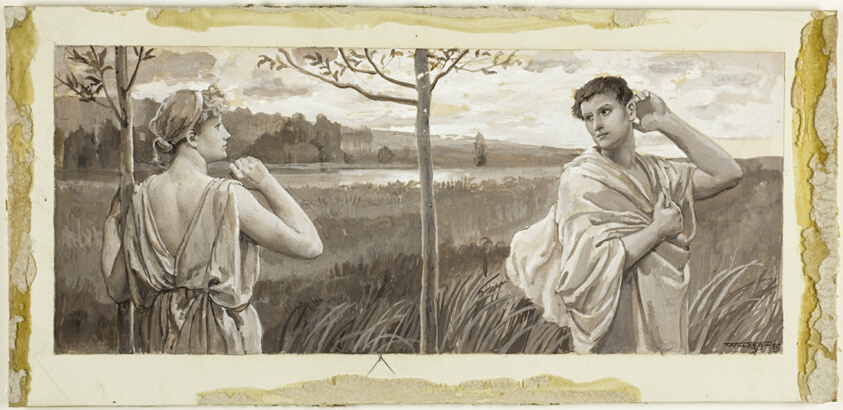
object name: Drawing and Watercolor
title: Lycius, Look Back, and Be Some Pity Shown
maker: Will Hicock Low (American, 1853-1932)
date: 1885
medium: Gray and white gouache, with touches of brown gouache, on cream wood-pulp laminate board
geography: United States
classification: drawings (visual works); prints and drawing